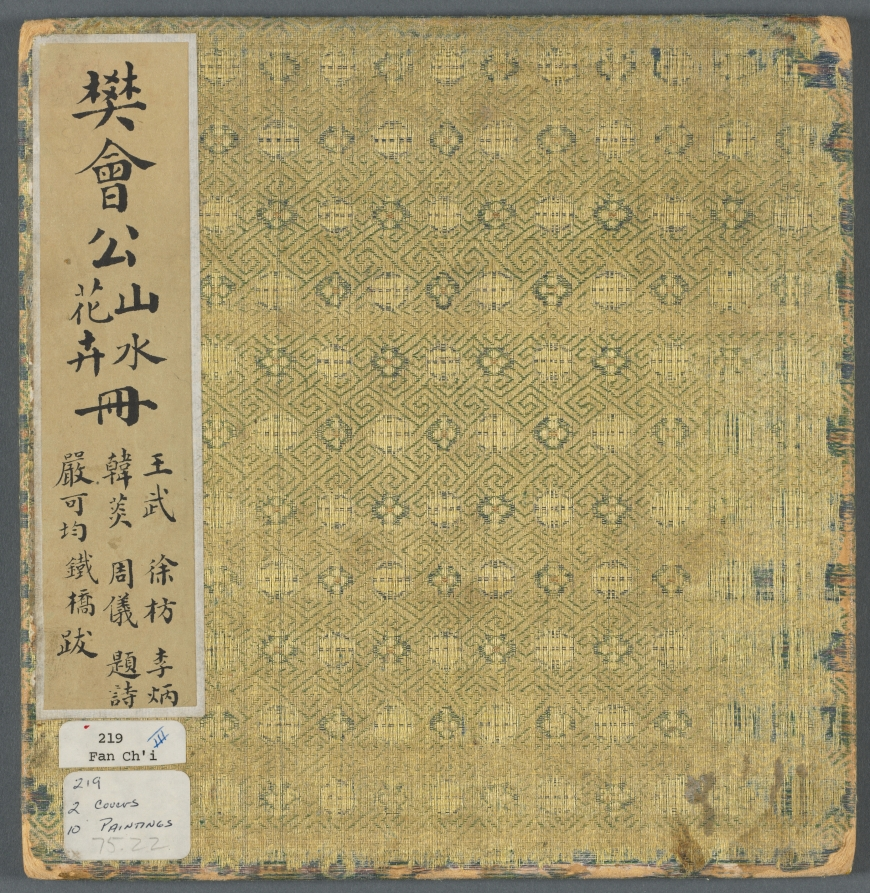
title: Album of Miscellaneous Subjects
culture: China, Qing dynasty (1644-1911)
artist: Fan Qi (Chinese, 1616–after 1694)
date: early 1650s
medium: album of ten leaves; ink and light color on silk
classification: Painting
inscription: 10 poems, 1 colophon, and 29 additional seals: 1 poem and 3 seals of Wang Wu 王武 (1632–1690); 2 poems and 6 seals of Han Tan 韓菼 (1637–1704); 2 poems and 6 seals of Xu Fang 徐枋 (1622–1694); 4 poems and 10 seals of Zhou Yi 周儀 (mid 17th century–about 1705); 1 poem and 3 seals of Li Bing 李炳 (17th century); 1 colophon and 1 seal of Tomioka Tessai 富岡鐵齋 (1836-1924).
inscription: Leaf 1. Poem by Wang Wu 王武 (1632–1690) A narrow path coiling, winds across rock foundations;/ Old vines and ancient trees meet the sunset's slanting rays./ Unaware that my small boat has gone so far,/ By the time it reverses its oars, the green mountains will be half-covered with clouds.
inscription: Leaf 2. Poem by Han Tan 韓菼 (1637–1704) A thousand feet of red cliffs look like a sculptured flower of Fu-yung;/ In one glance, the long bridge joins adjacent ridges./ Furthermore a wine shop stands in a bamboo grove;/ The fellow who bought some good wine is drunk on the eastern shore of the stream.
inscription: Leaf 3. Poem by Xu Fang 徐枋 (1622–1694) Green are the reeds, the sun not yet set;/ Tree foliage and mountain colors divide the lake in two halves./ A solitary recluse sits upon a flat bluff,/ Occasionally observing white clouds rising from the mountain tops.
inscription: Leaf 4. Poem by Xu Fang 徐枋 (1622–1694) By chance, I start my journey from the watershed to remote regions,/ Suddenly I sight the silhouette of mountains - myriad expanses of green./ What is this "Come-flying" Peak which now does not recede,/ Its rocky walls, linked to heaven, are drenched by a waterfall.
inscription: Leaf 5. Poem by Zhou Yi 周儀 (mid 17th century–about 1705) That stone path surrounded by streams - for whom was it created?/ Leaning on my staff, I walk and hum, arriving alone./ As soon as I ascend to gaze at these mountains, my happiness increases,/ Every morning the moistening dew makes slippery the green moss.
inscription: Leaf 6. Poem by Zhou Yi 周儀 (mid 17th century–about 1705) The bright moon emerges through the willow,/ The fragrance of flowers is already difficult to retain./ Listening above these tall branches,/ I sense that faraway in my native place autumn has arrived./ Obstructed, all the diminished waters flow,/ Abruptly the sound of a lute wafts to and fro./ A strong wind, unabated, blows among, the willow branches.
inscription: Leaf 7. Poem by Han Tan 韓菼 (1637–1704) Thoughts of autumn in the nuptial chamber with the new chill arising,/ The white frost all pervasive with a bright moon shining./ Outside the window, a crisp wind conveys the sound of crickets./ Within this quiet dream, I seem to sense the fragrance of orchids.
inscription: Leaf 8. Poem by Li Bing 李炳 (17th century) Maple leaves drift in the wind, the autumn gusts bracing,/ Hibiscus flowers steeped with water, the evening breeze light./ The moonlight's slanting beams shine upon dreaming lovers./ No wonder that pair of fowl should dream of the absent partners.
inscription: Leaf 9. Poem by Zhou Yi 周儀 (mid 17th century–about 1705) Ancient trees share the slanting rays of the setting sun/ Chilly ravens hover round their branches/ The leader of the flock thinks this is a good place to rest,/ Evening being the time for returning./ This flock is the so-called a filial crow,/ Who, in disgorging their food [to feed their young], have compassionate hearts,/ Were the people in the world all like this,/ Fine talent would be everywhere.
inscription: Leaf 10. Poem by Zhou Yi 周儀 (mid 17th century–about 1705) Green bamboo stand alone with a snowy covering,/ In the deep recesses of a secluded valley, the evening breeze is light./ White egrets are lean as shadows with the cold ripples frozen,/ They enter the gorge not just to admire the fish.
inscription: Artist's signature on the tenth painting: Zhongling Fan Qi 鐘陵樊圻 ["Fan Qi of Zhongling" (Zhongling is another name for Nanjing.)] Artist's ten seals, one on each painting: Fan Qi 樊圻.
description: Half of this album depicts landscapes; the other half depicts insects, birds, and natural subjects. Emanating peace and tranquility, Fan Qi’s landscapes reveal a quiescent vision and luminescence that lends an otherworldliness to his images. His insects and birds show his attention to minutiae and technical facility in the control of the brush.